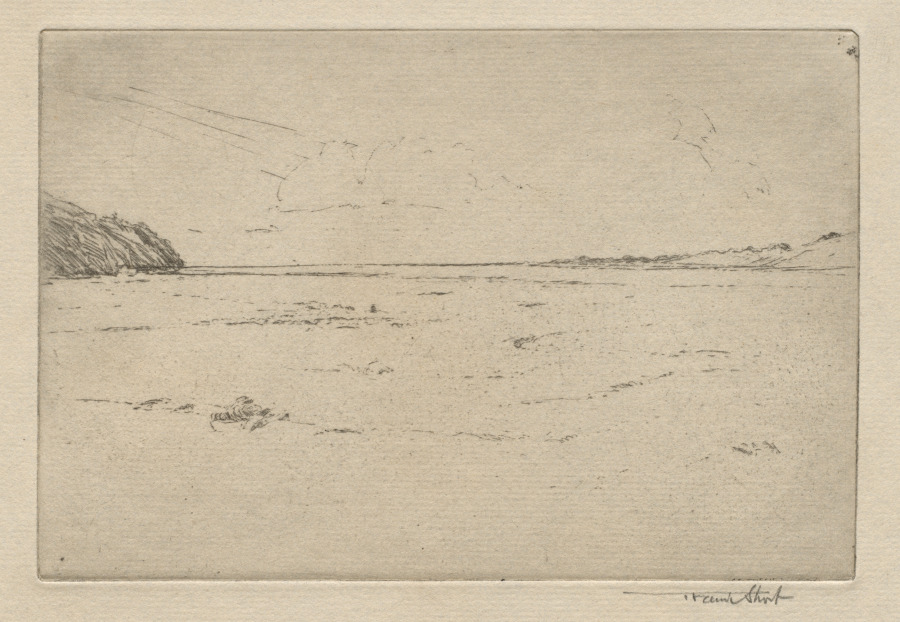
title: Gathering the Flock on Maxwellbank, No. 2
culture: England, 19th century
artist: Frank Short (British, 1857–1945)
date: 1892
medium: etching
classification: Print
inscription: Lower right, in graphite: Frank Short